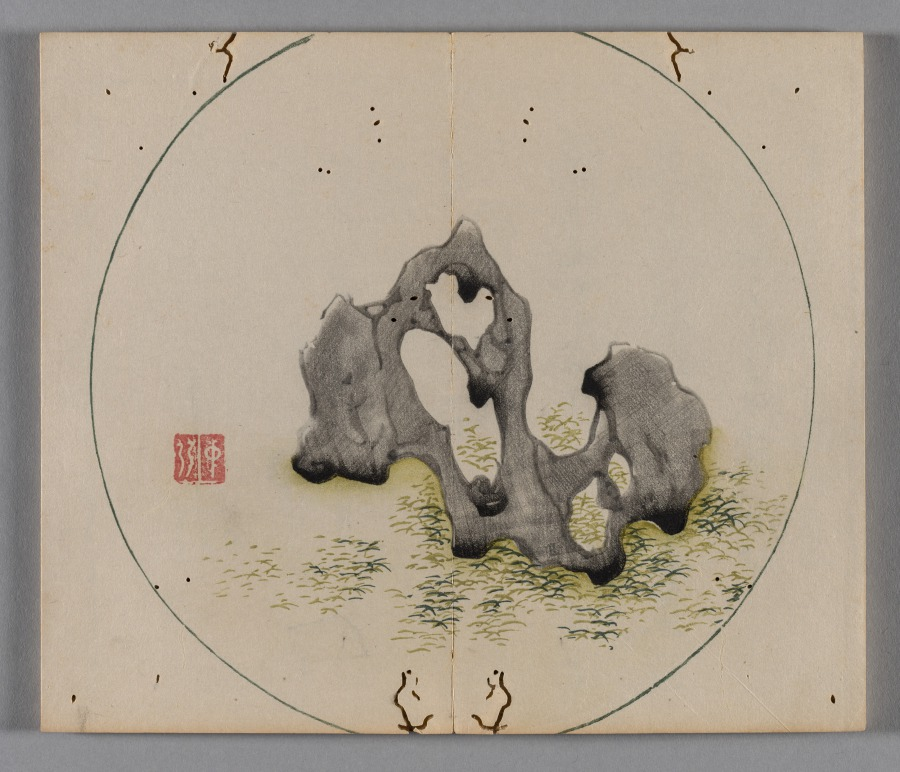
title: Ten Bamboo Studio Collection of Calligraphy and Painting: Round Fans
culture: China, Qing dynasty (1644-1911)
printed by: Hu Zhengyan (Chinese, c. 1584–1674)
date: 1633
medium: Woodblock-printed book; ink and colors on paper; first edition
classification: Print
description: Color printing reached a level of perfection in the early 1600s, as seen in this Ten Bamboo Studio Collection of Calligraphy and Painting and the Mustard Seed Garden Manual of Painting (printed 1679 and 1701). The painterly quality, precision in registering (aligning) the woodblocks, and harmonious colors made them the most successful color print editions in Chinese history. Both editions were printed and compiled in Nanjing, spread nationwide, and had a great impact on the arts in Japan and Korea.